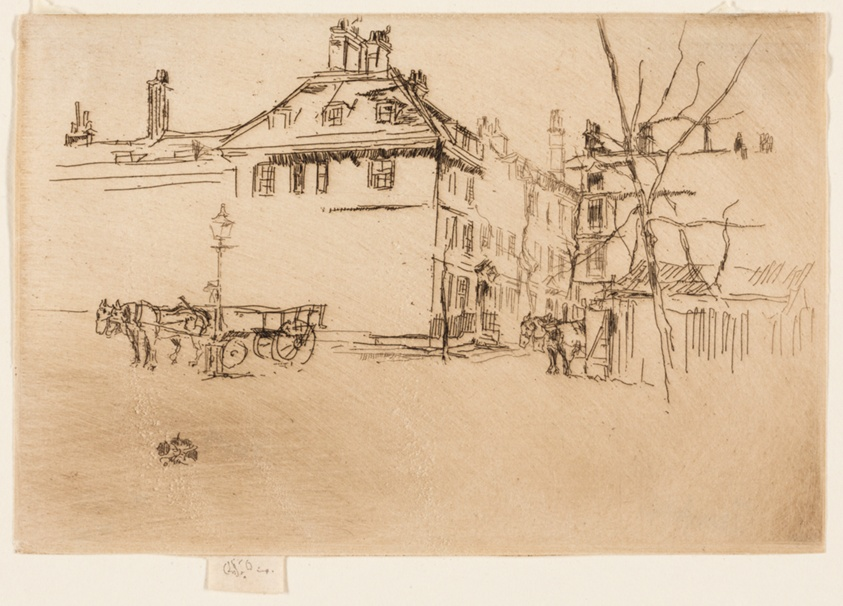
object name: Print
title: The Temple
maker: James McNeill Whistler (American, 1834-1903)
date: 1880/81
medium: Etching in black ink on ivory Asian laid paper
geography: United States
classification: etching; print; prints and drawing; paper